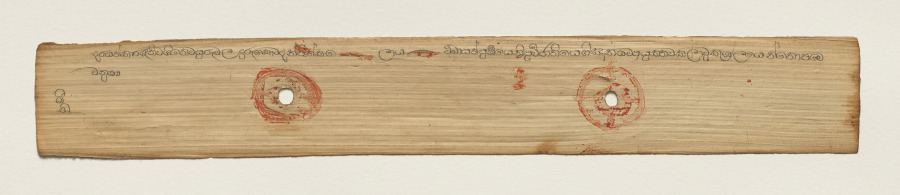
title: Leaf from a Buddhist Manuscript (recto)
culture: Sri Lanka, Singhalese, Late 17th century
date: c. 1700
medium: fiber paper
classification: Manuscript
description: Palm leaf material is still used for manuscripts in Sri Lanka. The palm leaves are prepared first by boiling them, drying them in the sun, and then rubbing them with oils. Scribes then use a metal stylus to incise the text. Then charcoal powder is wiped across the pages, filling in only the inscribed lines.